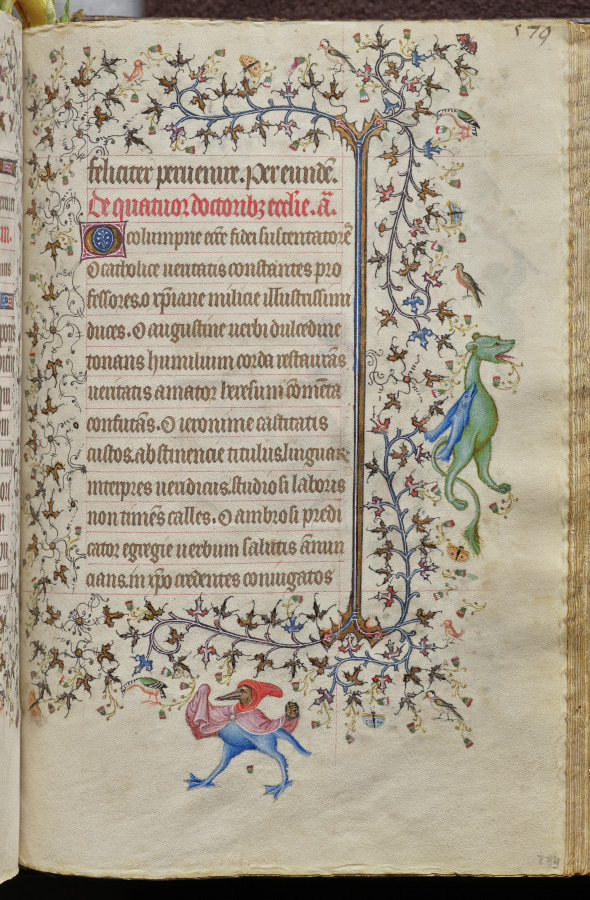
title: Hours of Charles the Noble, King of Navarre (1361-1425): fol. 284r, Text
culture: France, Paris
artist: Master of the Brussels Initials and Associates (French)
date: c. 1405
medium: ink, tempera, and gold on vellum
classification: Bound Volume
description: This precious volume was obviously highly prized by its owner, the French-born King of Navarre, who had his coat of arms painted on no less than twenty folios. Rather than directly commissioning this manuscript from a specific workshop, it seems that Charles the Noble acquired his book of hours -- perhaps ready-made for the luxury market -- while on a trip to Paris in 1404-05. A collaborative effort, six painting styles are evidenced within the pages of this codex, those of two Italians, two Frenchmen, and two Netherlanders. The painter who was responsible for the planning and decoration of the book, and who produced seventeen of the large miniatures, was a Bolognese artist known as the Master of the Brussels Initials. His principal assistant, responsible for most of the borders, was a Florentine who signed his name "Zecho" da Firenze on folio 208 verso.